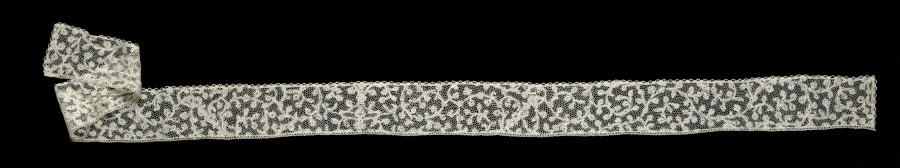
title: Lace Edging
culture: Italy, Milan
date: 1700s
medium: Linen: bobbin lace design on mesh ground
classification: Lace